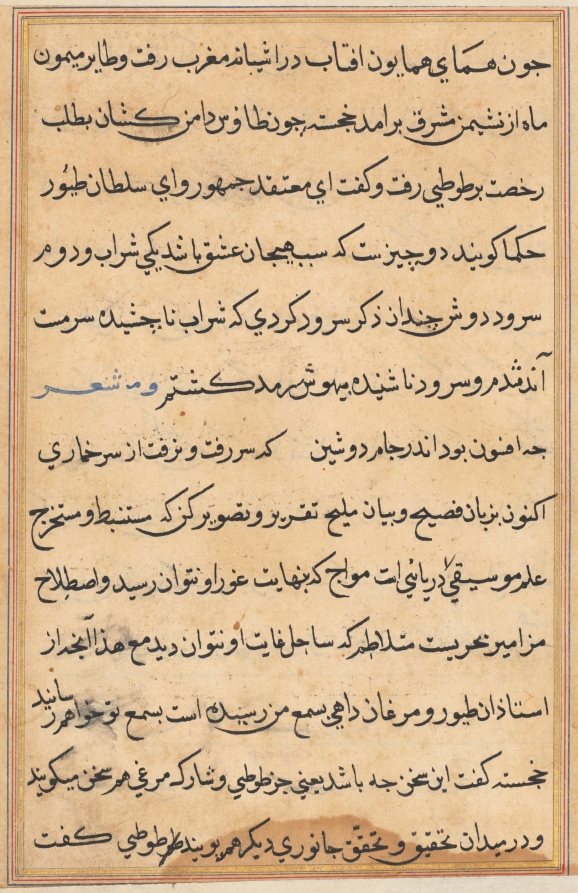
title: Page from Tales of a Parrot (Tuti-nama): text page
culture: Mughal India, court of Akbar (reigned 1556–1605)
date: c. 1560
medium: gum tempera, ink, and gold on paper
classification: Painting